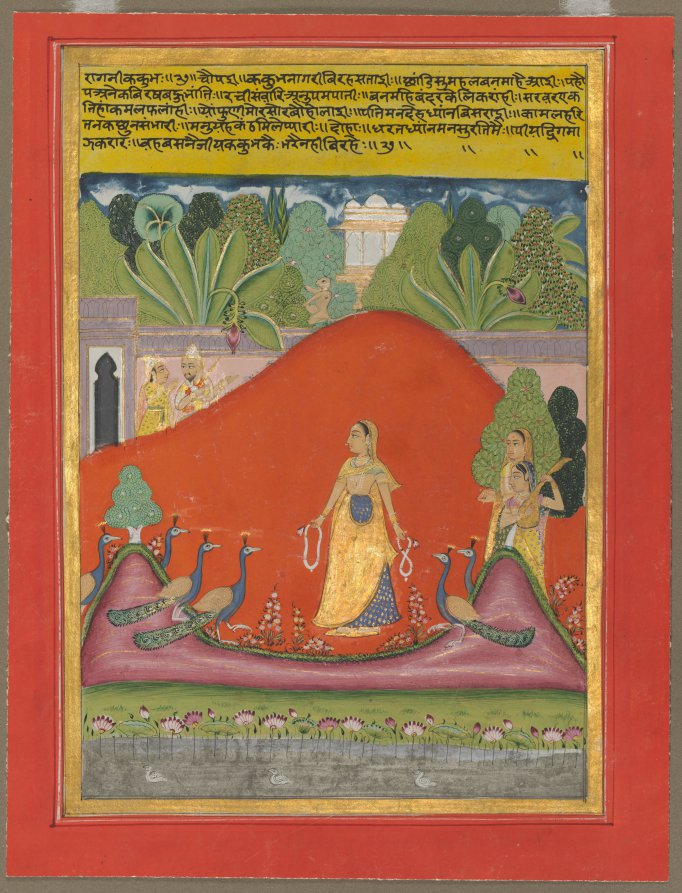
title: Kakubha Ragini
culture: India, Rajasthan, Probably Jaipur, 18th century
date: c. 1750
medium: color on paper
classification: Painting